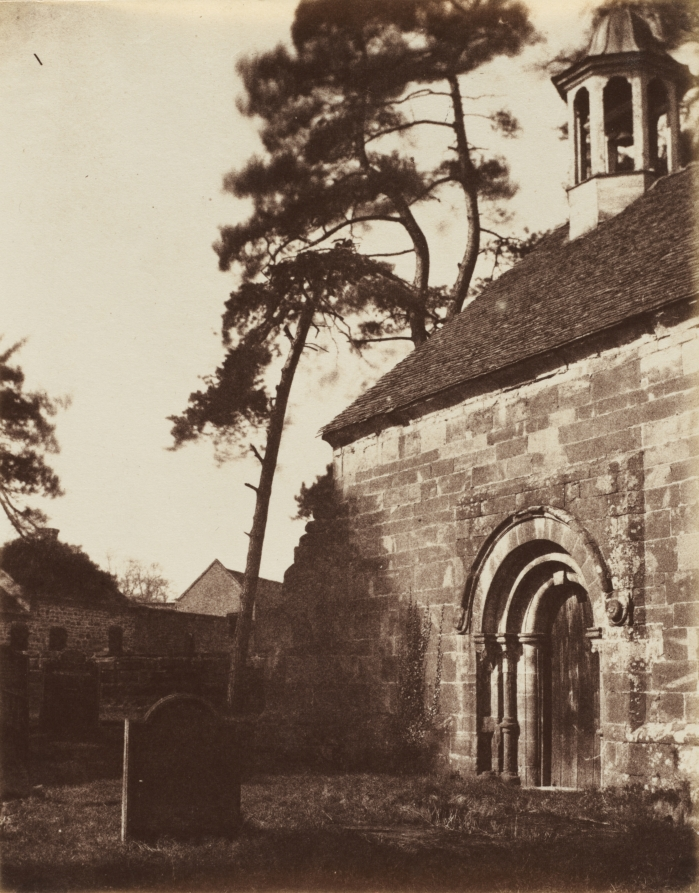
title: Woodcote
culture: England, 19th century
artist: Robert Henry Cheney (British, 1800–1866)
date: c. 1853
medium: albumen print from calotype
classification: Photograph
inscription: Written in brown ink on recto of mount: "Woodcote"